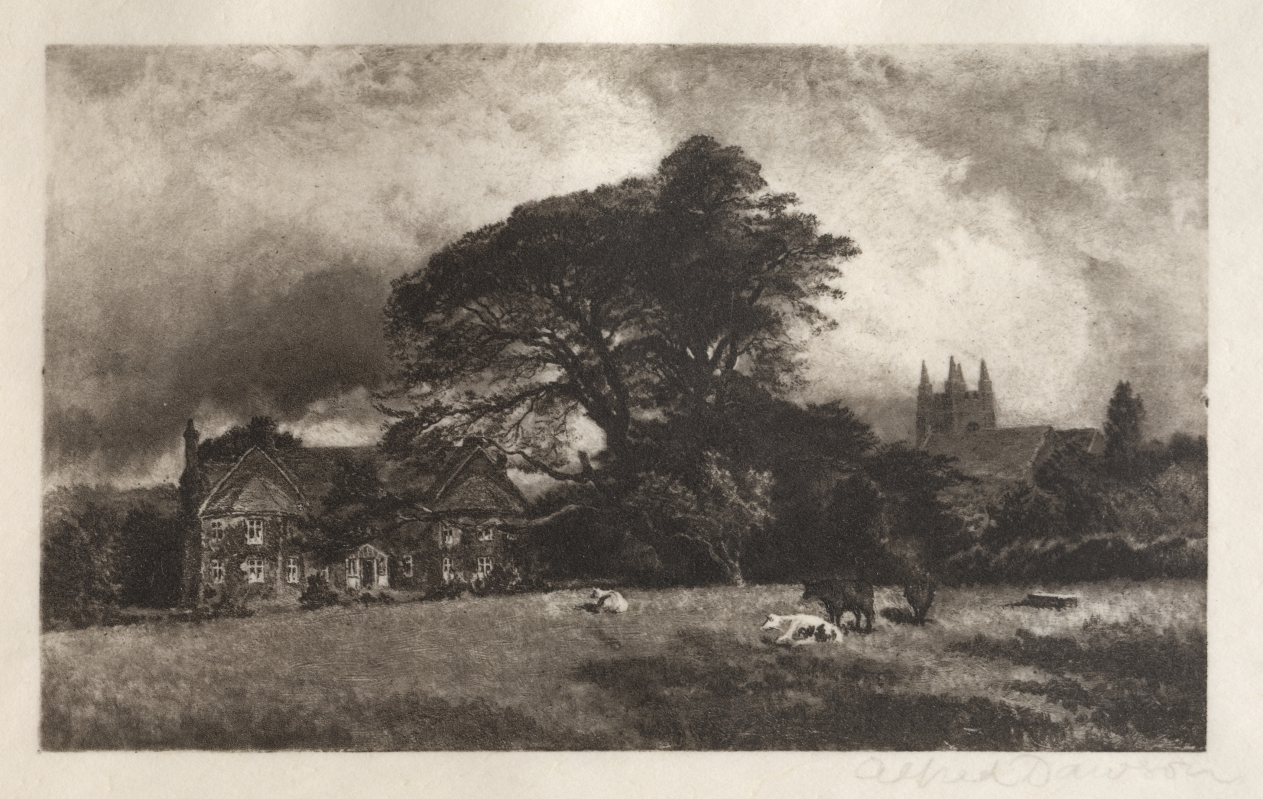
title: Eversley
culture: America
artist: Alfred Dawson (American)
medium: engraving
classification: Print